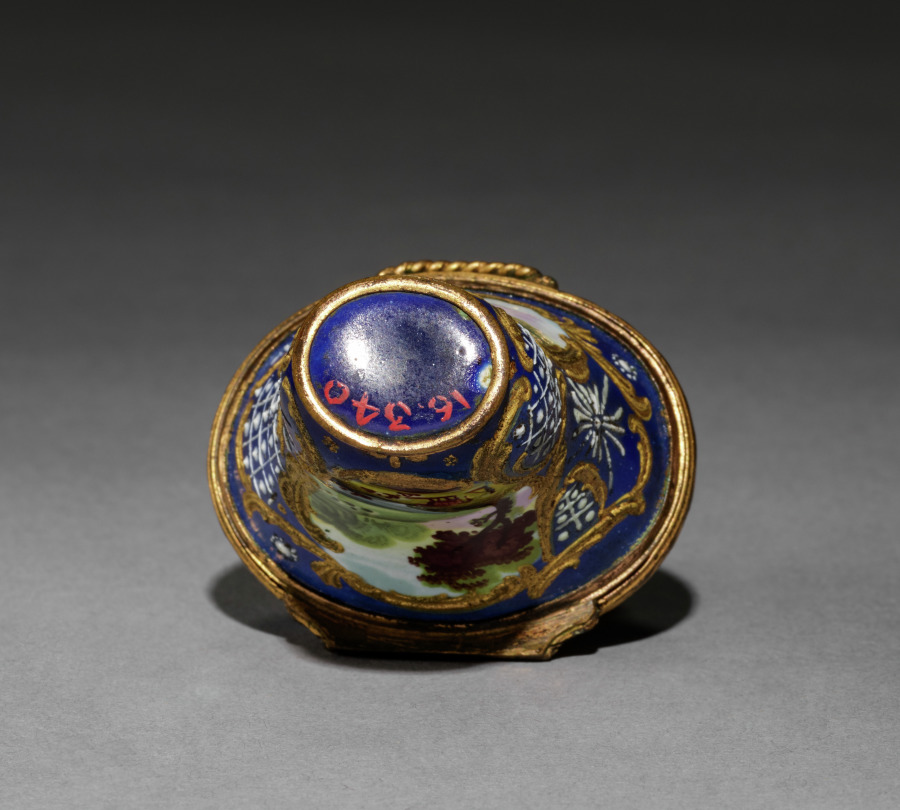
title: Scent Bottle and Box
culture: England, Staffordshire, 18th century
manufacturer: Staffordshire Factory (British)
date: 1750–1775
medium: enamel on copper with metal mounts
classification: Miscellaneous